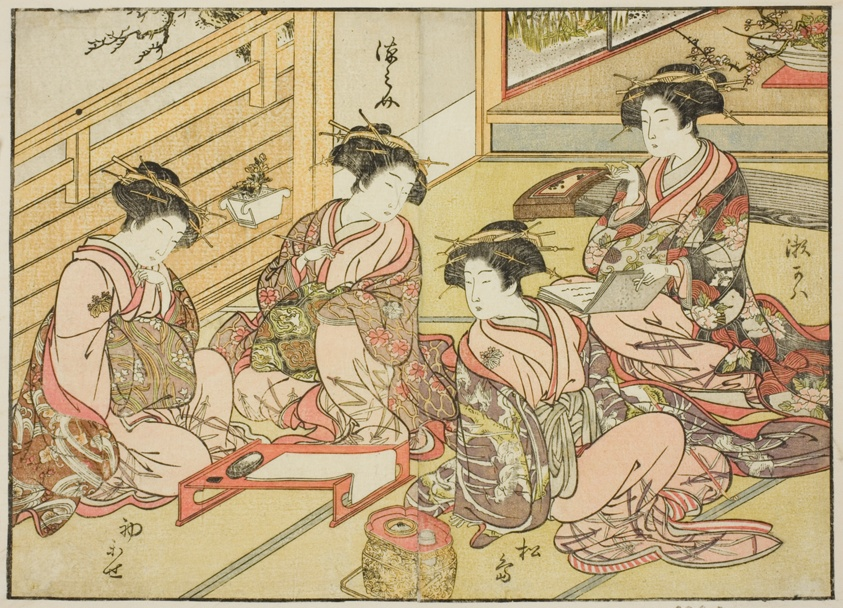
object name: Print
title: Courtesans of the Matsubaya, from the book "Mirror of Beautiful Women of the Pleasure Quarters (Seiro bijin awase sugata kagami)," vol. 1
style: Japanese (culture or style)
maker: Katsukawa Shunsho; Japanese, 1726-1792; Kitao Shigemasa; Japanese, 1739-1820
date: 1776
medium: Color woodblock print; double-page illustration cut from a book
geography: Japan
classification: woodblock print; print; asian art